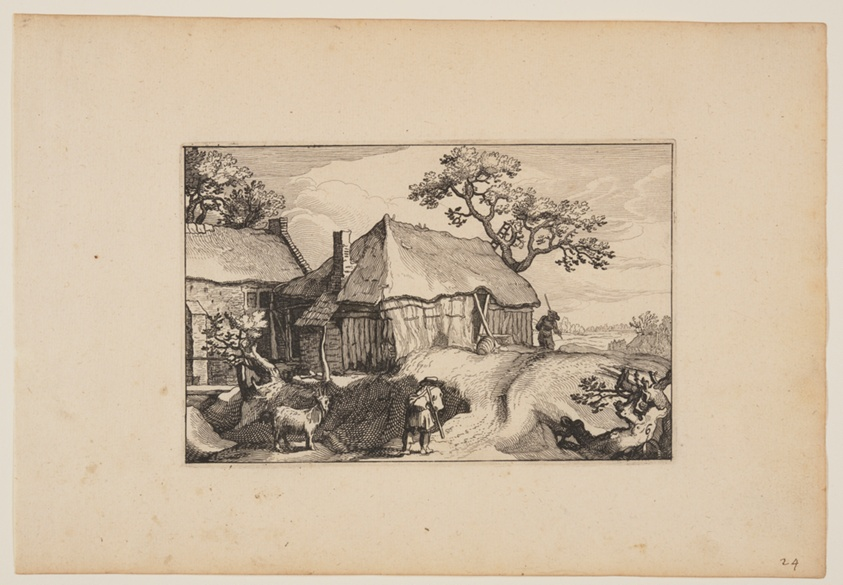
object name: Print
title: Path Along a Barn, from Landscapes (Verscheyden aerdige Lanthuysen...)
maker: Claes Jansz. Visscher (Netherlandish, c. 1550–c. 1612); after Abraham Bloemaert (Dutch, 1566–1651)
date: 1620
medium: Etching on ivory laid paper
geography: Netherlands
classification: print; paper; prints and drawing; etching